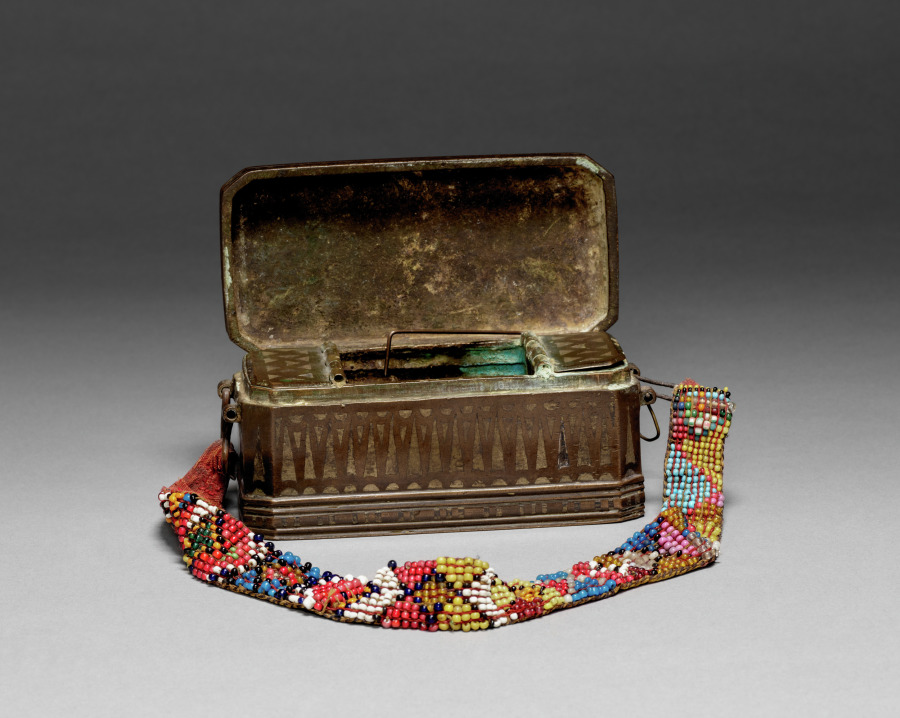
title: Betel nut container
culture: Philippines, Mindanao, most likely Maranao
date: 1800s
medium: Cast brass with silver inlays, weave fabric (handle), glass beads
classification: Arms and Armor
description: Chewing betel has been a social ritual common throughout Southeast Asia and Oceania for centuries. This betel nut container held the ingredients (areca nut, slaked lime, and betel leaves) used for this practice. The rectangular box, made of cast brass, is richly decorated with inlaid silver geometric motifs. It features a multicolored beaded strap with a pattern typical of the Bagobo people.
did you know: The beaded strap suggests portability; it may have been worn or suspended during social gatherings.